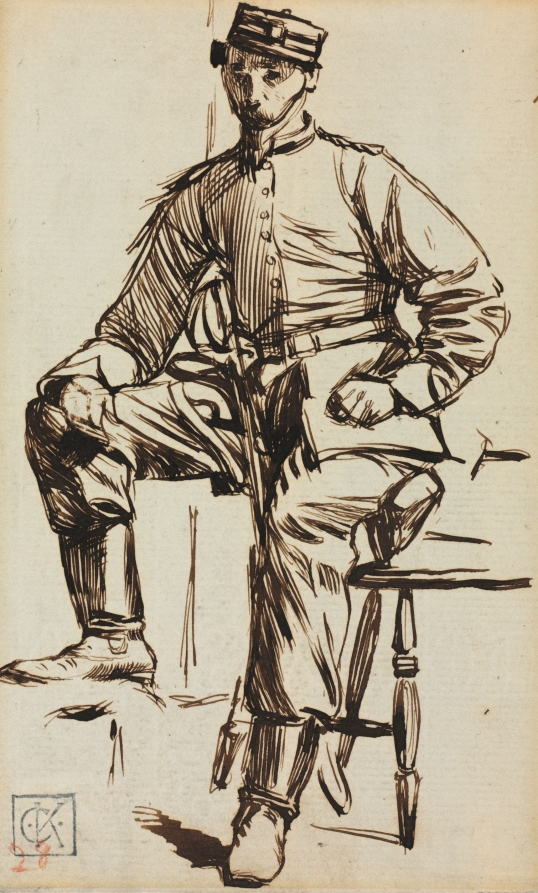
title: Charles Keene as a Volunteer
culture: England, 19th century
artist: Charles Samuel Keene (British, 1823–1891)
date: c. 1842–91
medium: pen and brown ink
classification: Drawing